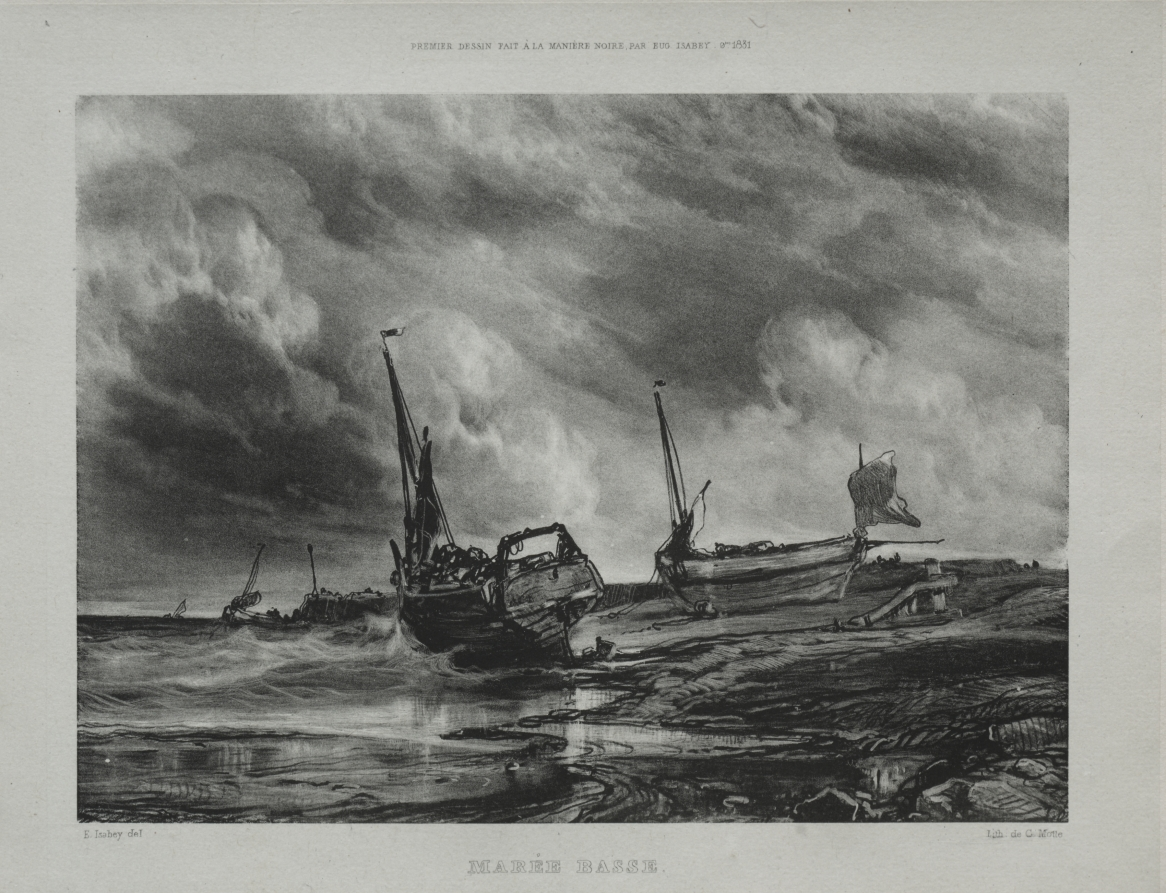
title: Marée basse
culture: France, 19th century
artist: Eugène Isabey (French, 1803–1886)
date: 1831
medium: lithograph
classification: Print